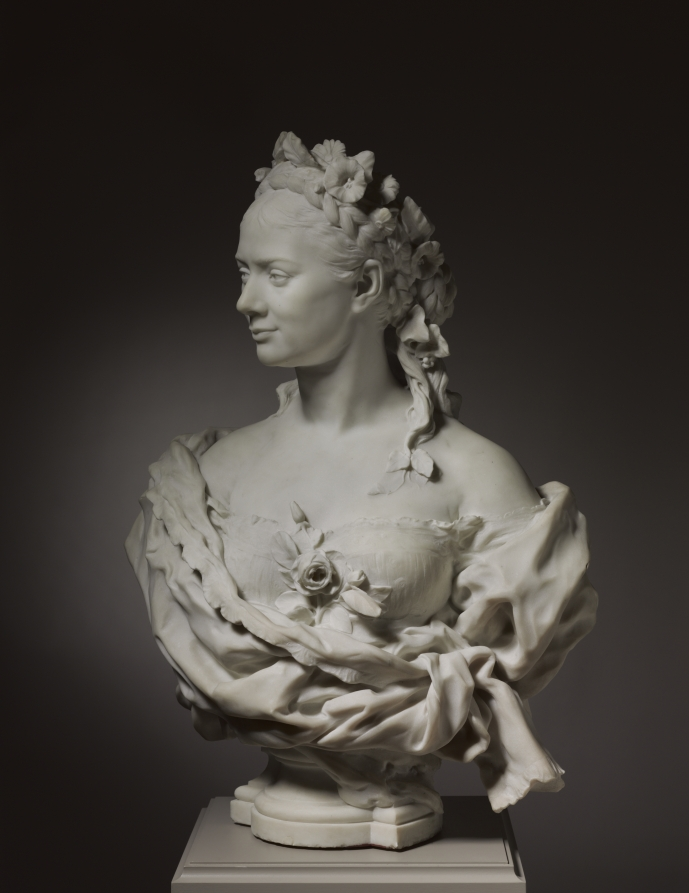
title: Bust of a Lady (possibly Fanny Coleman)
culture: France, 19th century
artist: Jean-Baptiste Carpeaux (French, 1827–1875)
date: 1872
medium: marble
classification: Sculpture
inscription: inscribed on base: J. Bte CARPEAUX 1872.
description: Abandoning the strict frontality and symmetry of the neoclassical style, Carpeaux was instead inspired by French portrait busts of the 1600s and 1700s. This bust probably depicts Fanny Coleman, an English actress with whom Carpeaux may have had a romantic relationship. The turn of the head and the undulating drapery infuse the figure with a sense of drama. Patronized by Napoleon III, Carpeaux created the celebrated figural group La Danse for the facade of the Opera Garnier in Paris, a work renowned for its sensual nudes, but denounced by contemporaries as an affront to public decency.